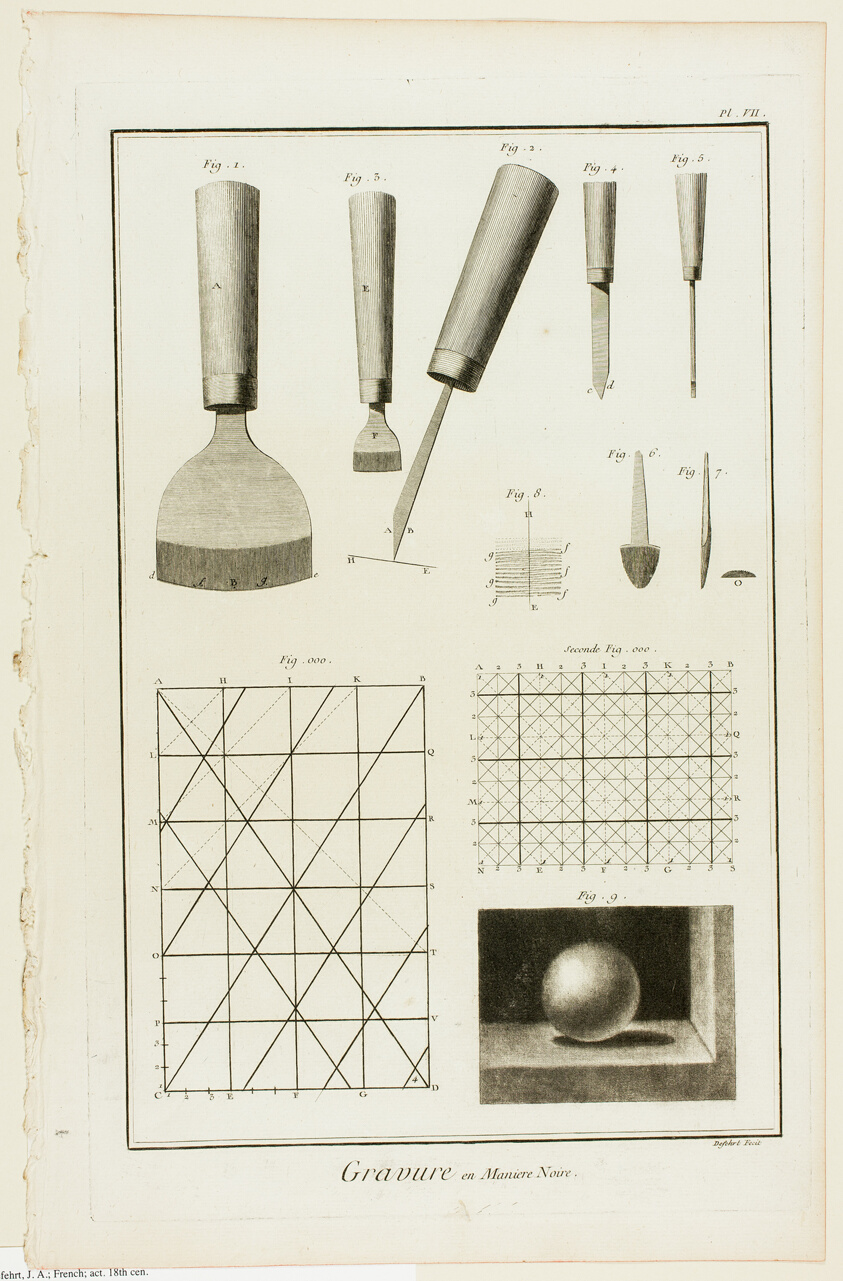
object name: Print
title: Mezzotint, from Encyclopédie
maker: A. J. Defehrt (French, active 18th century); published by André le Breton (French, 1708-1779), Michel-Antoine David (French, c. 1707-1769), Laurent Durand (French, 1712-1763), and Antoine-Claude Briasson (French, 1700-1775)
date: 1762/77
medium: Engraving and mezzotint on cream laid paper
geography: France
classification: etching; print; prints and drawing